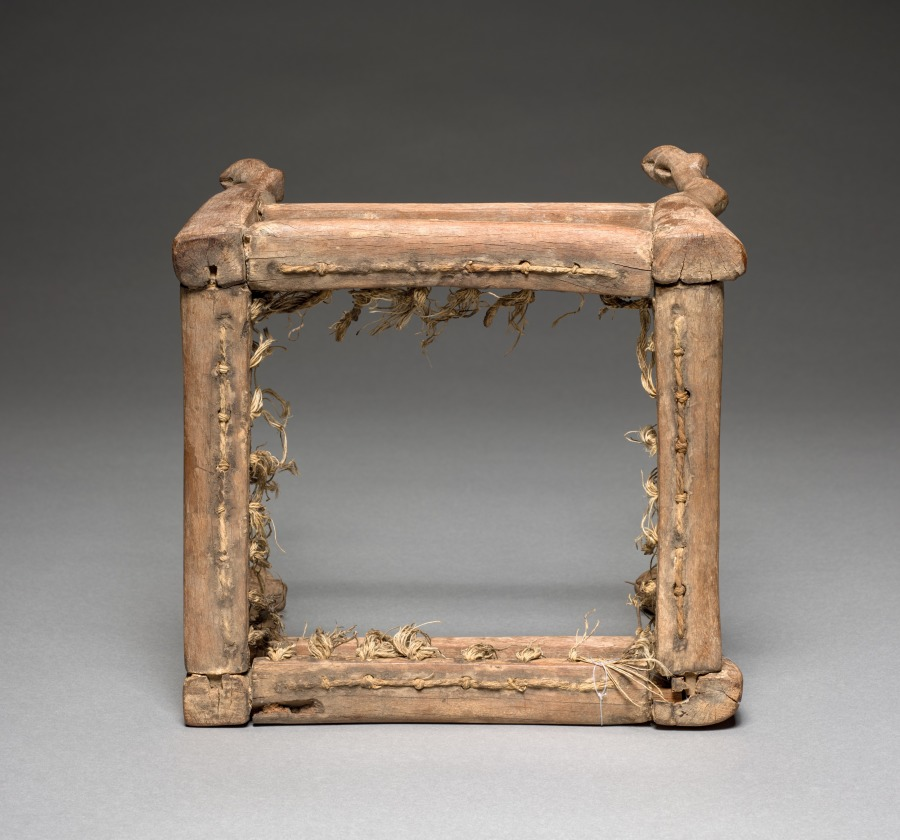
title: Child's Stool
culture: Egypt, New Kingdom (1540–1069 BCE), Dynasty 19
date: 1295–1188 BCE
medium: wood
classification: Funerary Equipment